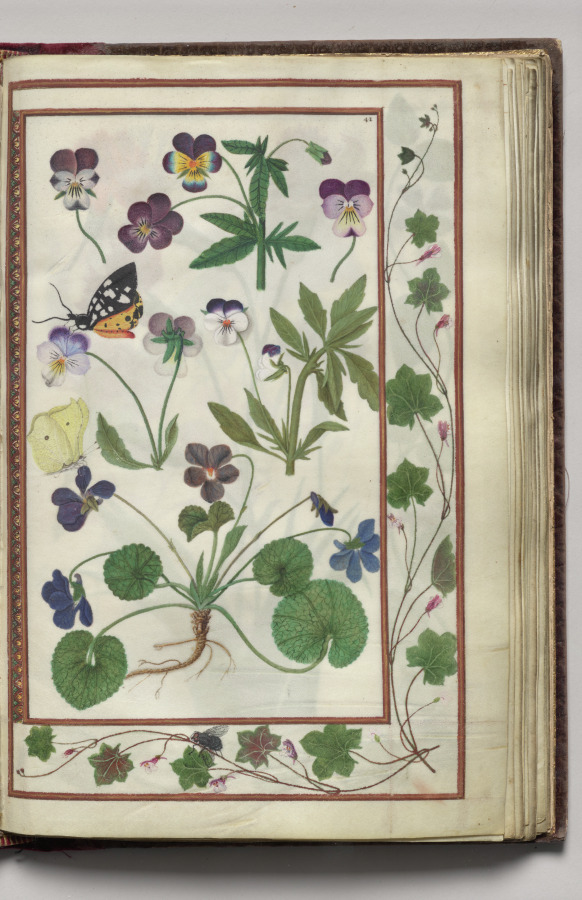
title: Violas with Leaf and Fly Border, folio 21 (recto), from Florilegium (A Book of Flower Studies)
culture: France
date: 1608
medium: watercolor, ink, silver, and gold over occasional traces of pencil, on vellum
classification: Bound Volume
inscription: Dated: Poitiers 1608 (on frontispiece) Signed: On frontispiece in black ink, lower right: Van Kuyk Notation on drawing: Frontispiece: in pencil, lower margin: * élève de Van Kessel, peintre flammand (* in pencil also appears in front of Van Kuyk's name).